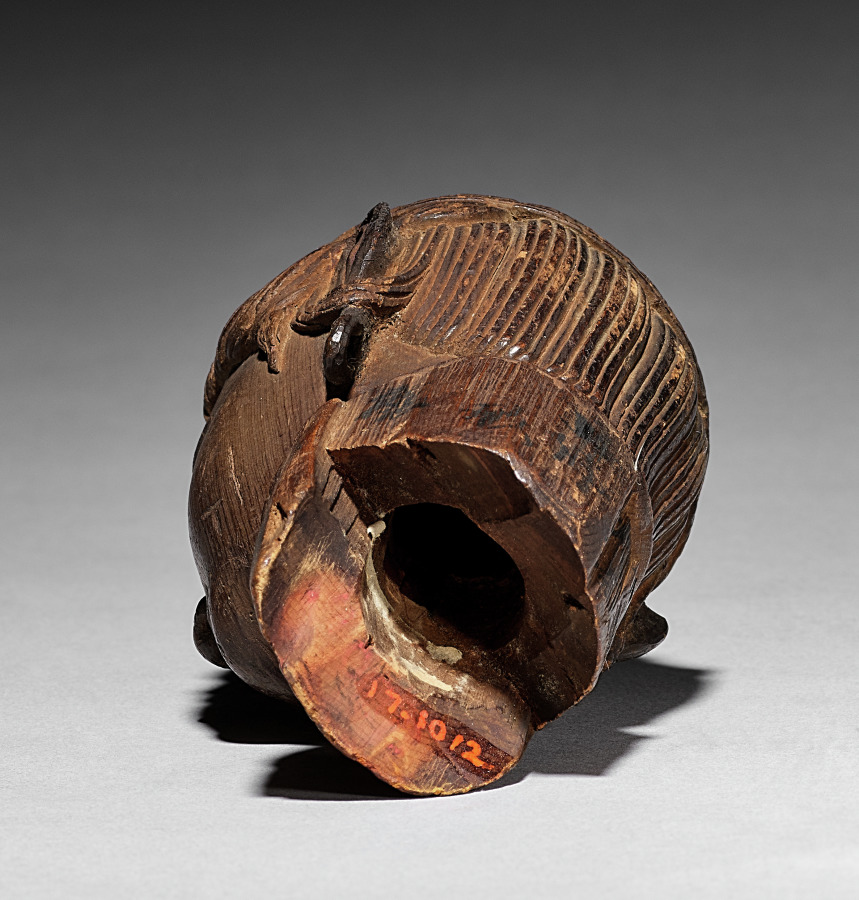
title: Head of Kannon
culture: Japan, Edo period (1615–1868)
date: late 1600s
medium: wood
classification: Sculpture